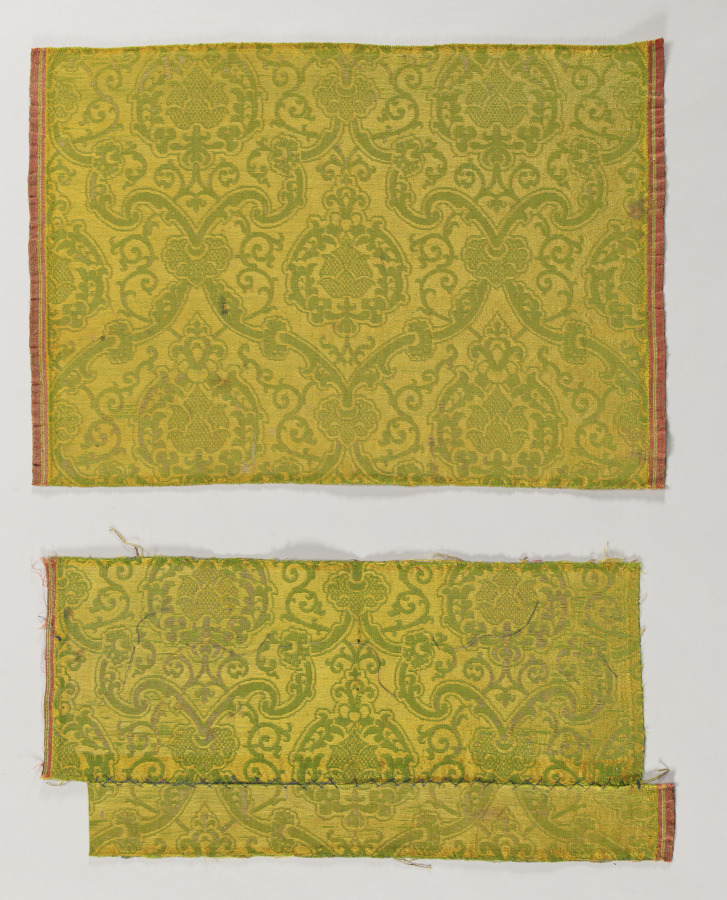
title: Lengths of Fabric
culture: Italy or Spain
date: 1500s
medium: silk and linen: brocade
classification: Textile